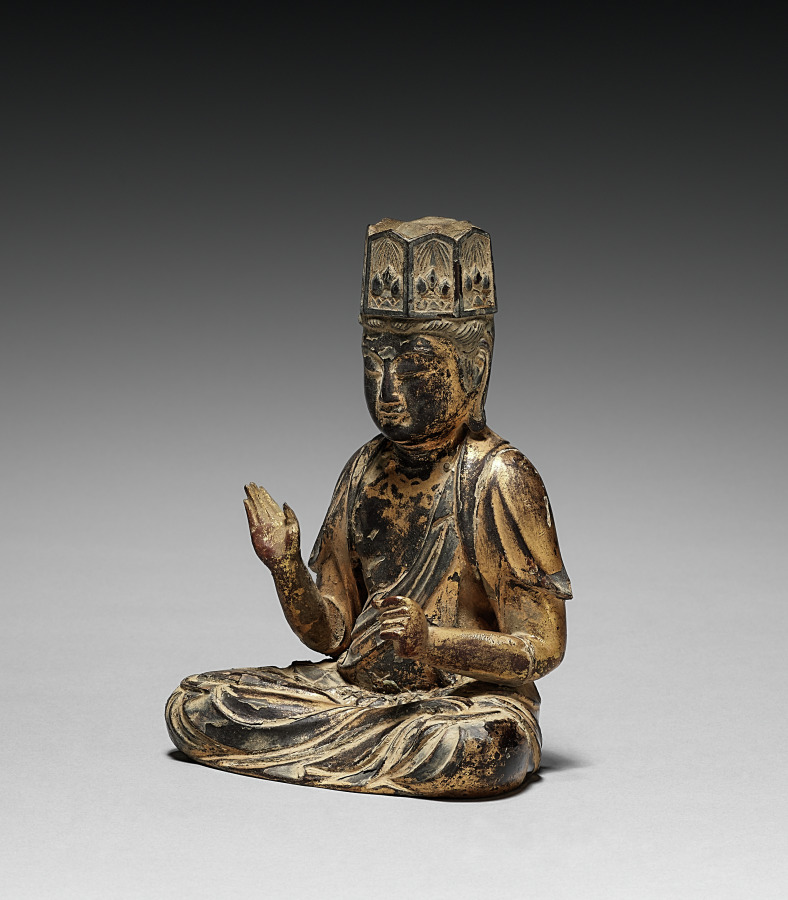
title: Bodhisattva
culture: Japan, Heian period (794–1185)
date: 900s-1100s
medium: gilded wood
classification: Sculpture